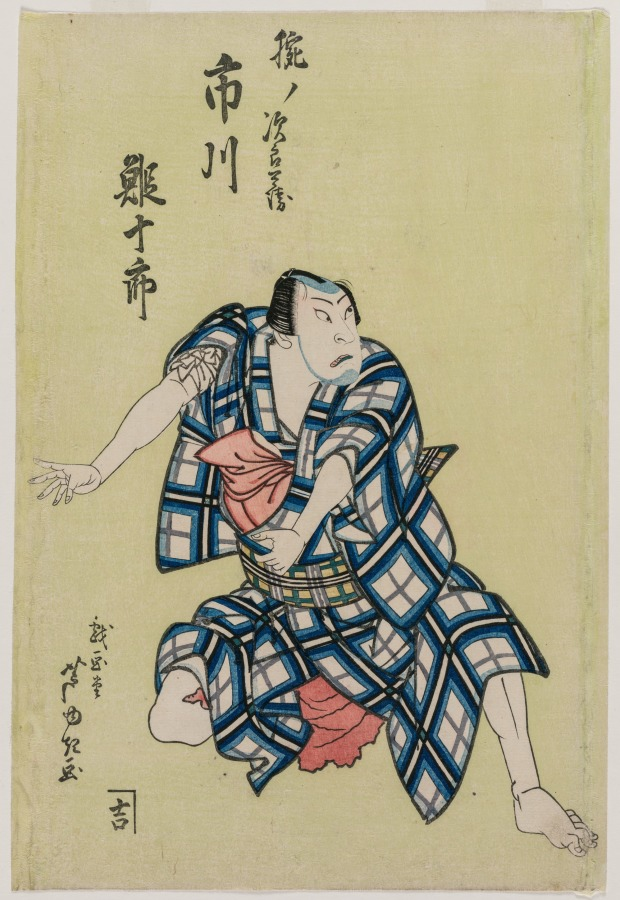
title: Ichikawa Ebijuro II as Ude no Jirobei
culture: Japan, Edo period (1615–1868)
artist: Gigadō Ashiyuki (Japanese, active 1813–34)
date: c. 1813–34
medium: woodblock print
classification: Print